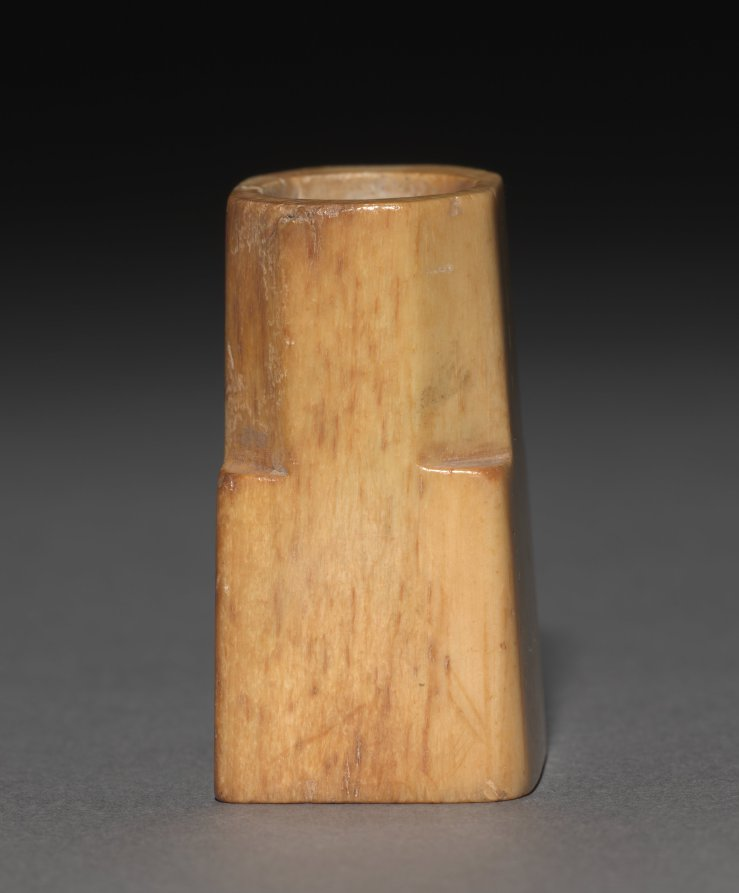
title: Carved Bone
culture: Parthian Empire (247 BCE–224 CE)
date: 1–200 CE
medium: carved bone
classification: Miscellaneous